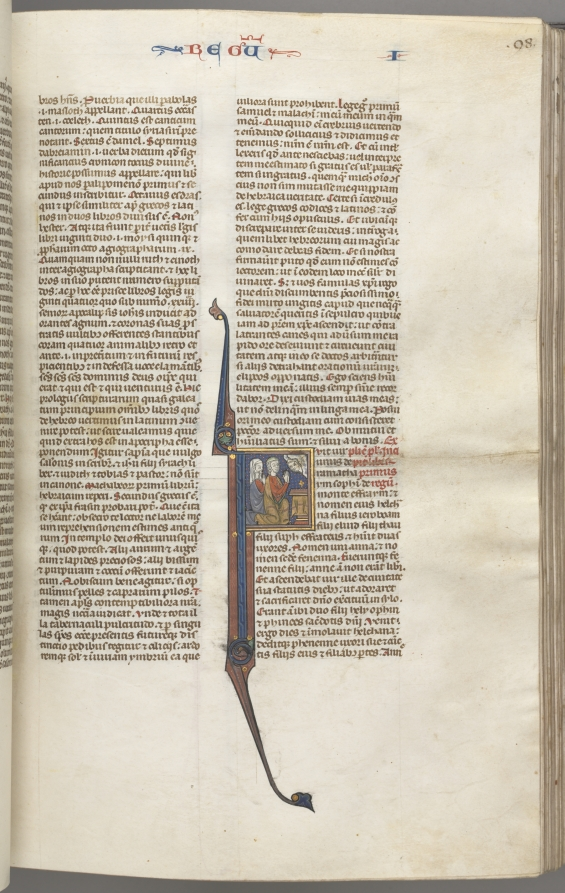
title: Fol. 98r, Kings I, historiated initial F, Elkanah and Hannah kneeling before an altar with God appearing above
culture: Southern France, Toulouse(?), 13th century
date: c. 1275–1300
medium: ink, tempera and gold on vellum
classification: Bound Volume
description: Biblical manuscripts were highly prized and important possessions of churches, monasteries, cathedral schools, and universities throughout medieval Europe. The biblical texts were known as the vulgate, the translations made by Saint Jerome in the fourth century from Hebrew and Greek into Latin, which became the definitive and official Latin version of the Roman Church. In the 13th century, the bible was, for the first time, produced as a single volume with an officially sanctioned sequence to its books and chapters as illustrated by this example. The very extensive decoration of this bible is arranged hierarchically to indicate the relative importance of the various texts so that full or almost full-page initials mark the openings of the first prologue, Genesis, and the first Gospel; historiated initials mark the beginning of each book and illuminated initials mark the Prologues.